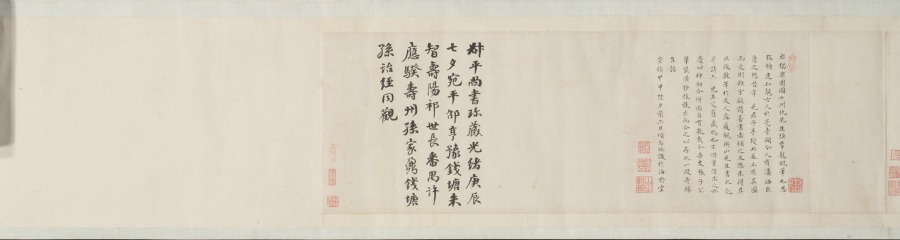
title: Garden for Solitary Enjoyment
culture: China, Ming dynasty (1368–1644)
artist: Qiu Ying (Chinese, 1494–1552)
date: 1515–52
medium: Handscroll; ink and light color on silk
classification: Painting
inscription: Accompanying text of an essay together with seven poems of Sima Guang (1019–1086) and one poem of Su Shi (1037–1101) written by Wen Zhengming (1470–1559) in 1558.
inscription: 2 colophons and 82 seals: 4 seals of Wen Zhengming 文徵明 (1470–1559); 59 seals of Xiang Yuanbian 項元汴 (1525–1590); 1 colophon, dated 1644, and 7 seals of Xiang Yukui 項禹揆 (c. late 1500s–1659); 1 colophon, dated 1880, and 2 seals of Weng Tonghe 翁同龢 (1830–1904); 2 seals of Ch'eng Chen-i (19th c.); 1 seal of Han Ch'ung (19th c.); 4 seals of Wan-go H. C. Weng 翁萬戈 (1918–2020); 3 seals unidentified.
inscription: Colophon by Xiang Yukui 項禹揆 (c. late 1500s–1659): The painting of The Garden for Self-enjoyment on the right by Shih-chou, Mr. Qiu [Qiu Ying] is in the style of Li Lung-mien. Its mood is peaceful, as if meeting the ancient gentlemen face to face among the brushes and silk; it lifts one above the sordid bustle of life. Formerly, my late father handed me this scroll which had only the painting without the written essay. I considered asking a good calligrapher to write the essay to add to it but was afraid that the quality of the writing would not match the painting. Several years later, I saw at a friend's house this essay and poems (of Ssu-ma Kuang] written by Hengshan [Wen Zhengming], once owned by my grandfather; so I spared no expense to obtain it. I rejoiced at this and said: "The divine swords are finally united. How things are pre-destined!" Now my friend Chang Kung-chao's technique for mounting [painting and calligraphy] is excellent. Therefore by daring to take them out and join them together, I can preserve this beautiful story of singular reunion. Xiang Yukui recorded at Hai-yeh-t'ang [hall] two days before New Year's Eve in the jiasheng year of the Chongzhen era [1644]. trans. LYSL/HK/WKH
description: Garden of Solitary Enjoyment refers to a site built in 1073 by the statesman Sima Guang (1019–1086) after he had retired to Luoyang, Henan province. Every spring, visitors would flock to his garden. Each of its seven structures references a historic figure. Sima wrote: I channel streams [like Du Mu], to water flowers [like Bai Juyi], or trim bamboo [like Wang Huizhi]. . . . I know of no joy between heaven and earth that could take its place. Qiu Ying’s painting, created after an 11th-century version of the same theme, must have appealed to garden owners of the Ming dynasty, since it became the template for numerous Suzhou workshop copies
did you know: Sima Guang completed his monumental survey of Chinese history, Zizhi tongjian, in the garden depicted in this painting.